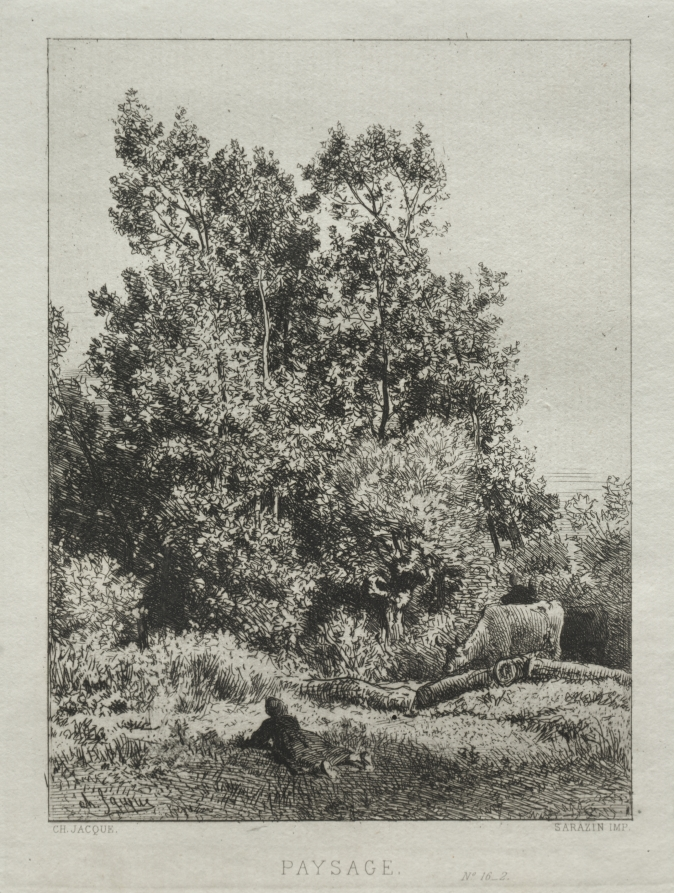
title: Landscape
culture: France, 19th century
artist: Charles-Émile Jacque (French, 1813–1894)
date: 1864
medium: etching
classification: Print